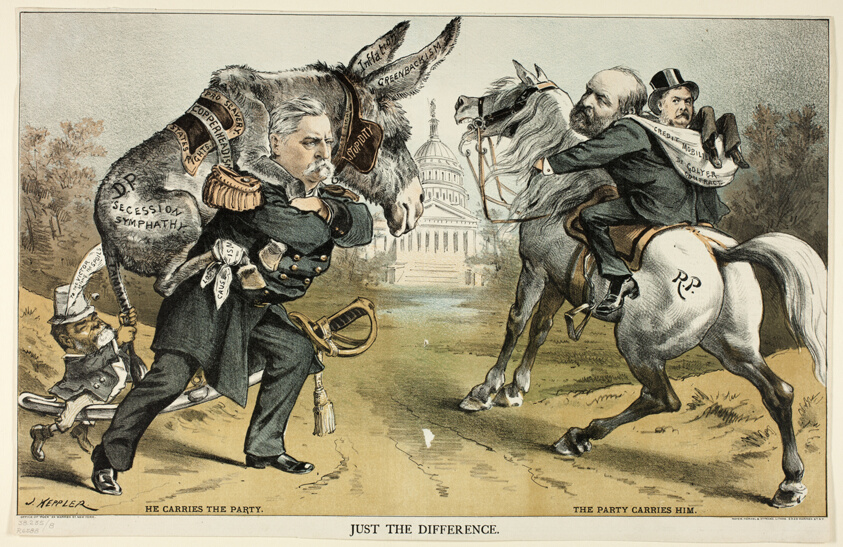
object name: Print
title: Just the Difference, from Puck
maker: Joseph Keppler (American, 1838-1894)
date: 1880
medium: Color lithograph on newsprint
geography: United States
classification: lithograph; print; prints and drawing